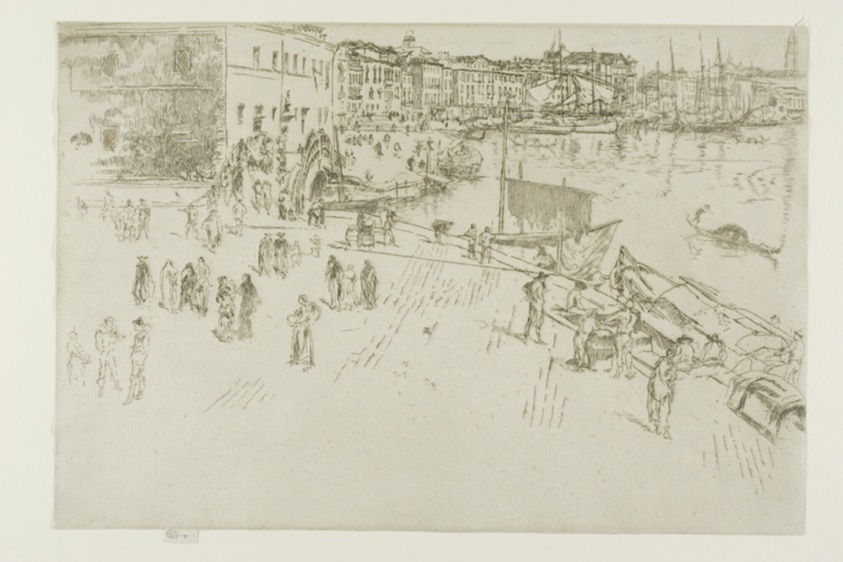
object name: Print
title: The Riva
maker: James McNeill Whistler (American, 1834-1903)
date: 1879/80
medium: Etching and drypoint with foul biting in dark brown ink on ivory laid paper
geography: United States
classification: etching; foul biting; print; prints and drawing; drypoint; paper